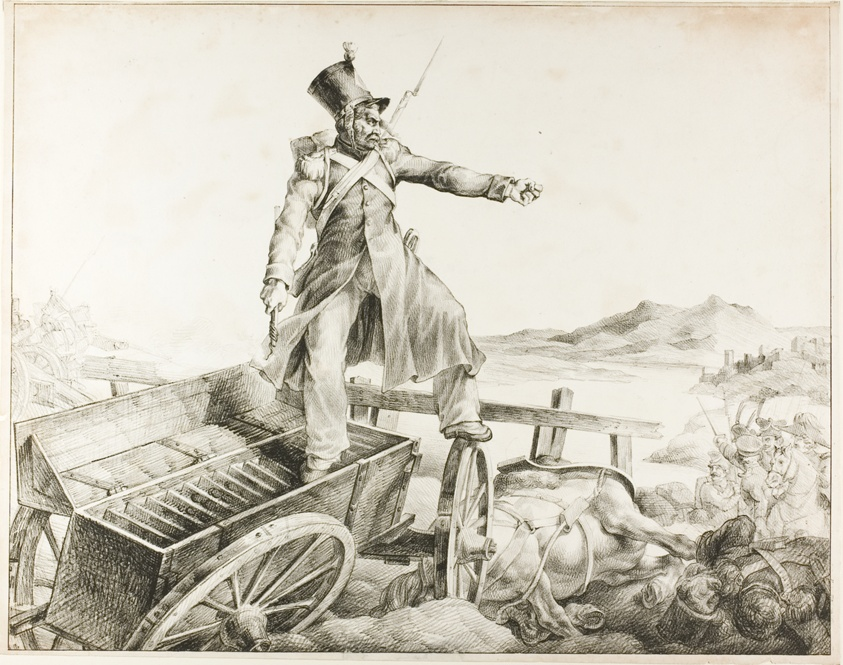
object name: Print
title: The Artillery Caisson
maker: Jean Louis André Théodore Géricault (French, 1791-1824)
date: 1818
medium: Lithograph in black on ivory wove paper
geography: France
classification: lithograph; print; prints and drawing